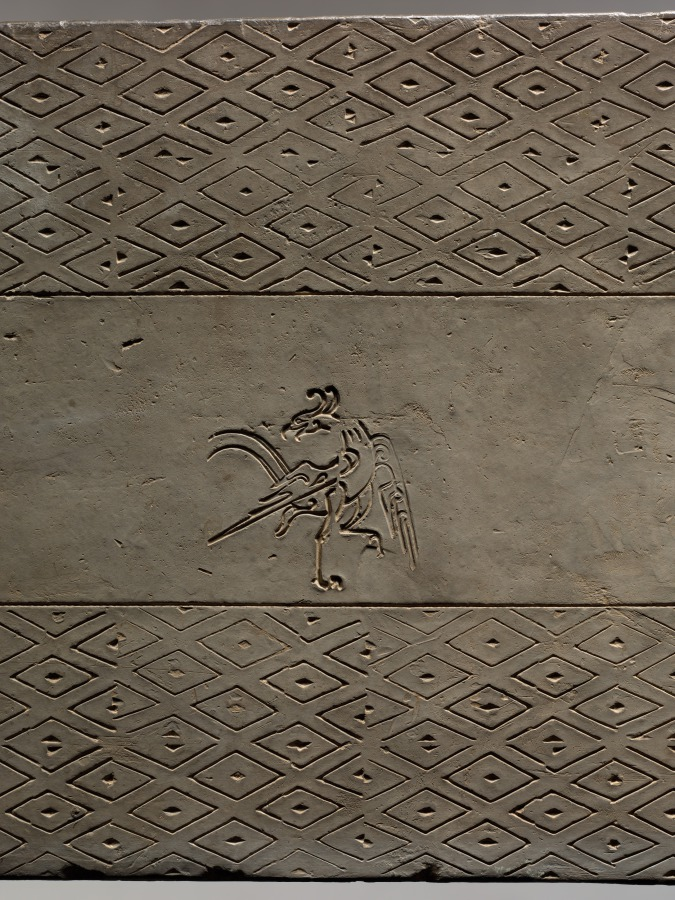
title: Tomb Tile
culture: China, Henan province, Jincun, Eastern Zhou dynasty (770–256 BCE)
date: 771–256 BCE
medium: earthenware with stamped decoration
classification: Ceramic